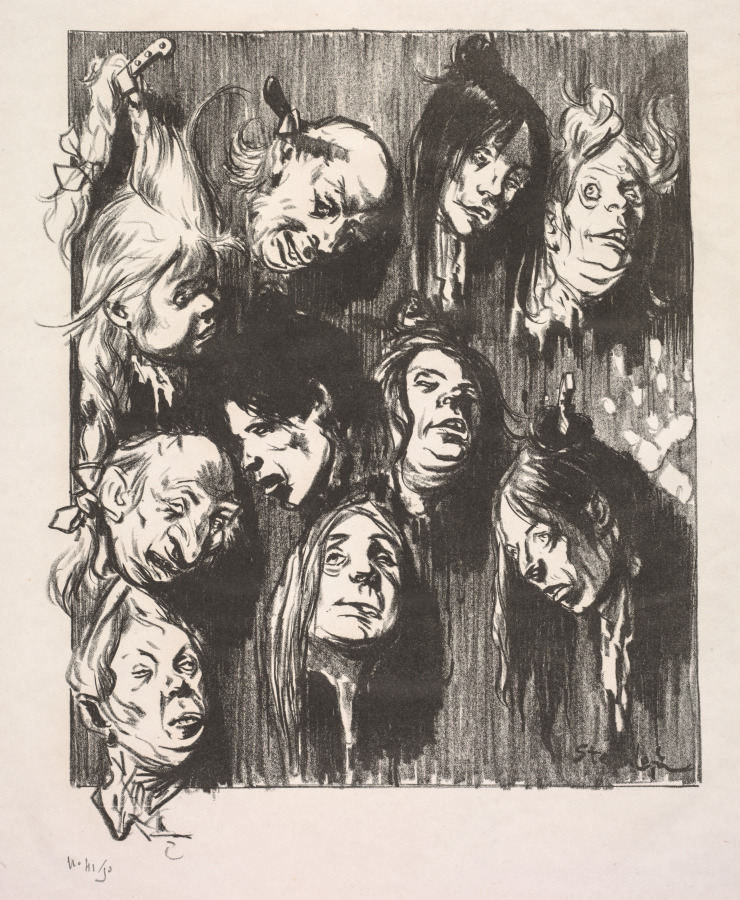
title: Ten Assassinations for a Penny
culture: Switzerland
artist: Théophile Alexandre Steinlen (Swiss, 1859–1923)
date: 1897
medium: lithograph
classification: Print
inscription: in pencil, lower left margin: No 41/50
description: Nineteenth-century French lithographs, including Steinlen’s charged political images, offer wide-ranging documentation of the life at the time. In 1881 France passed a law granting freedom of the press, resulting in numerous magazines of humor and social criticism. An advocate for the poor, the downtrodden, and the working classes, Steinlen contributed artwork to journals linked to the leftist movement, such as the anarchist publication La feuille (The Newspaper), in which Ten Assassinations for a Penny was reproduced. Steinlen’s illustrations for La feuille comment satirically on the articles written by Zo d’Axa, the editor-in-chief. A sense of gloom and violence that parallels the pessimism of the writing permeates the somber images. Marked by strong contrasts of black and white, Ten Assassinations for a Penny has an unsettling, even frightening quality intended to shock the reader into acknowledging the deep-seated problems in French society.